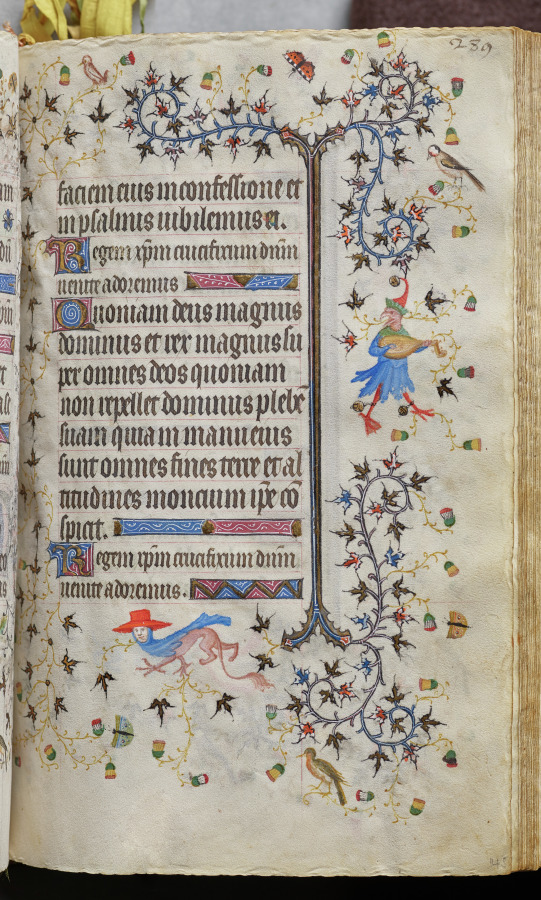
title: Hours of Charles the Noble, King of Navarre (1361-1425): fol. 145r, Text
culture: France, Paris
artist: Master of the Brussels Initials and Associates (French)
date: c. 1405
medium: ink, tempera, and gold on vellum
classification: Bound Volume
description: This precious volume was obviously highly prized by its owner, the French-born King of Navarre, who had his coat of arms painted on no less than twenty folios. Rather than directly commissioning this manuscript from a specific workshop, it seems that Charles the Noble acquired his book of hours -- perhaps ready-made for the luxury market -- while on a trip to Paris in 1404-05. A collaborative effort, six painting styles are evidenced within the pages of this codex, those of two Italians, two Frenchmen, and two Netherlanders. The painter who was responsible for the planning and decoration of the book, and who produced seventeen of the large miniatures, was a Bolognese artist known as the Master of the Brussels Initials. His principal assistant, responsible for most of the borders, was a Florentine who signed his name "Zecho" da Firenze on folio 208 verso.